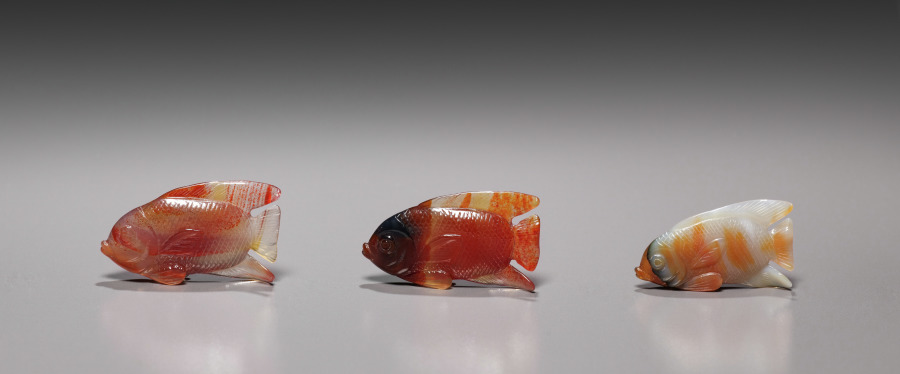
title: Set of Three Fish in Original Box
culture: Russia, St. Petersburg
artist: House of Fabergé (Russian, 1842–1918)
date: c. 1890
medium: agate, holly, silk velvet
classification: Miscellaneous